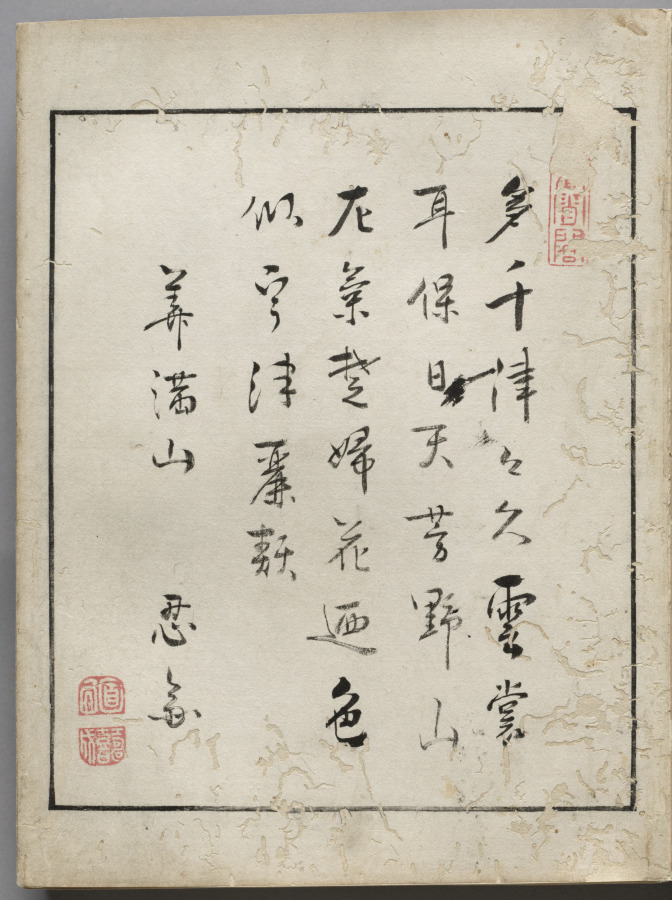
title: Leaf from Accordion-Style Album of Actor Portraits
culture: Japan, Edo period (1615–1868)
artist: Shōrakusai (Japanese)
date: c. 1790–1810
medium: leaf from accordion-style album; ink on paper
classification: Bound Volume